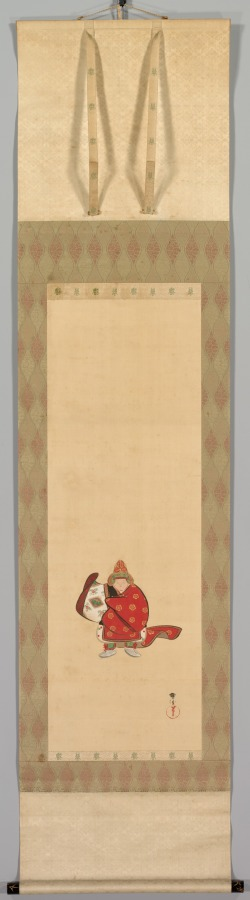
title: Bugaku Dancer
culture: Japan, Meiji period (1868–1912) to Shōwa period (1926–89)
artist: Kamisaka Sekka (Japanese, 1866–1942)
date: c. 1890–1942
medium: hanging scroll; ink and color on silk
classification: Painting